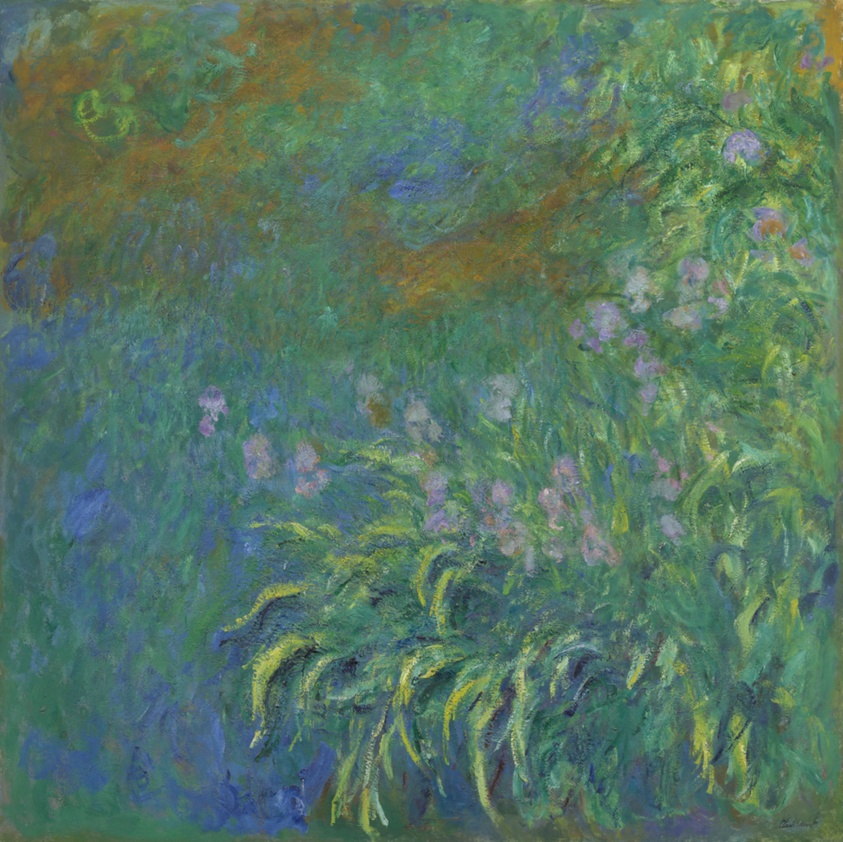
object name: Painting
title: Irises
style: Impressionism, 20th Century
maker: Claude Monet (French, 1840–1926)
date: 1914–17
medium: Oil on canvas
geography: France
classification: oil on canvas; paint; oil paintings (visual works); french; european painting; painting; modern and contemporary art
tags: irises, flowers, green (color), blue, blue (color), purple (color), foliage, landscapes, water